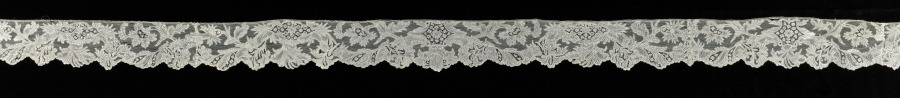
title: Lace Edging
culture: Italy, Venice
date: 1700–1740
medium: Needle lace (Grounded Venetian Point)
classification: Lace